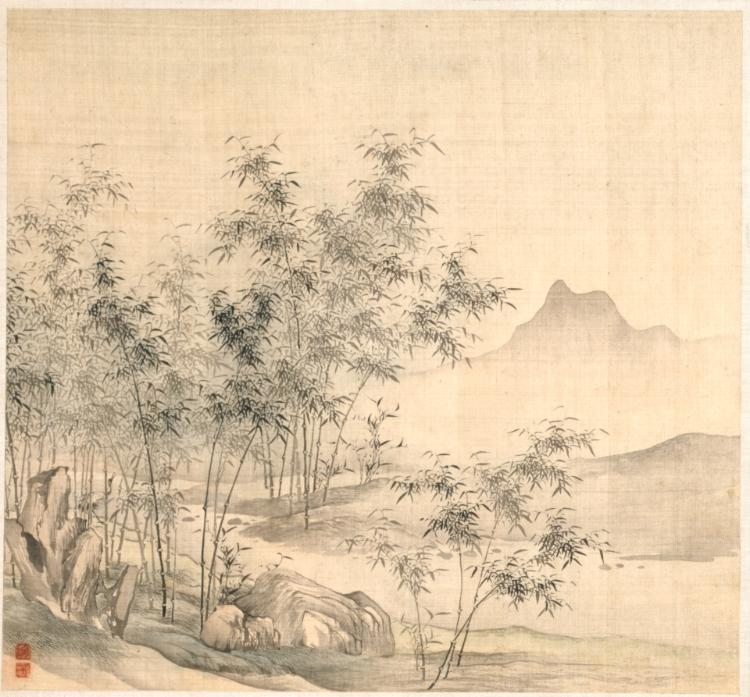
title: A Solitary Crane in the Bamboo Grove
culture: China, Ming dynasty (1368–1644)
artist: Tao Hong (Chinese, active c. 1610–1640)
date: early 1600s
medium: album leaf, ink and color on silk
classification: Painting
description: Although little known today, Tao Hong was a versatile artist who here depicts farmers returning home after a day in the fields. The shallow stream and dormant rice fields, the returning birds, and light sprinkles of green foliage all indicate the beginning of the farming season and hope for a good harvest. While the first leaf of this pair, 1999.223, depicts rural life, this one is of a more poetic nature. A lone crane stands in a bamboo grove. By using light colors and nuanced brushwork, Tao Hong achieves an effect of natural light and luminosity.